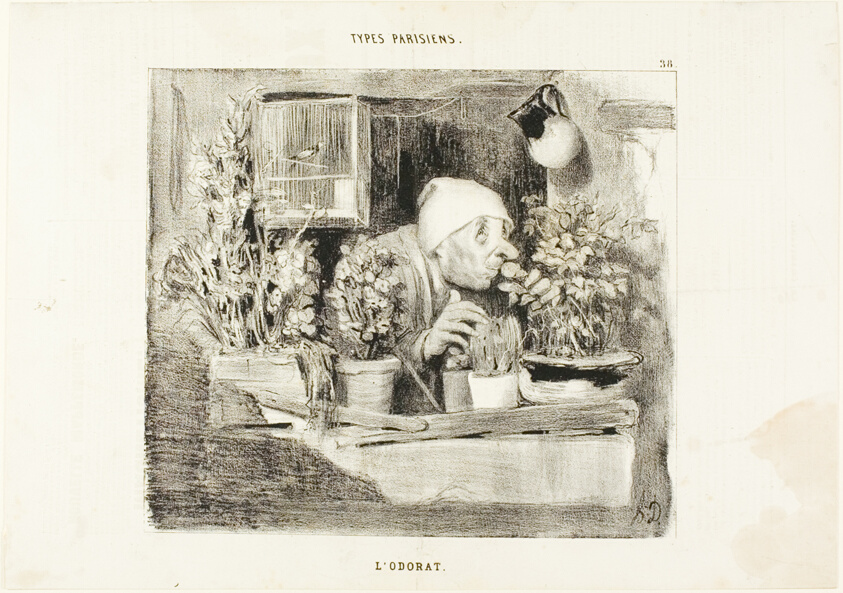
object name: Print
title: Smell, plate 38 from Types Parisiens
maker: Honoré Victorin Daumier; French, 1808-1879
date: 1839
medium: Lithograph in black on white wove paper, with letterpress verso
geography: France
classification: lithograph; print; prints and drawing